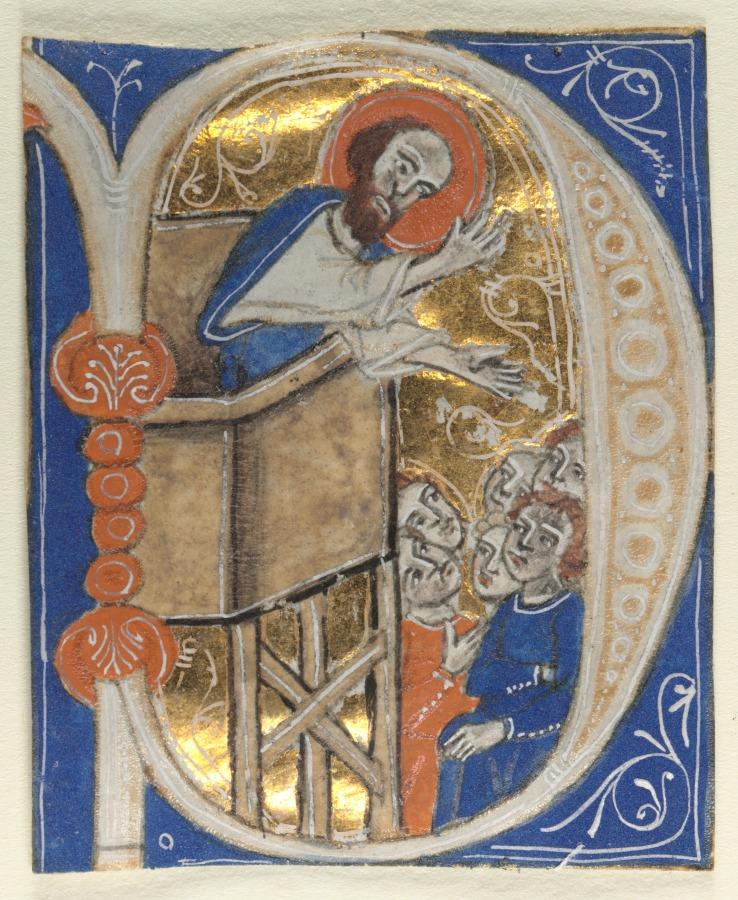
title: Historiated Initial Excised from a Bible (set of nine)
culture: Italy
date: 1200s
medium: tempera and gold on parchment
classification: Manuscript